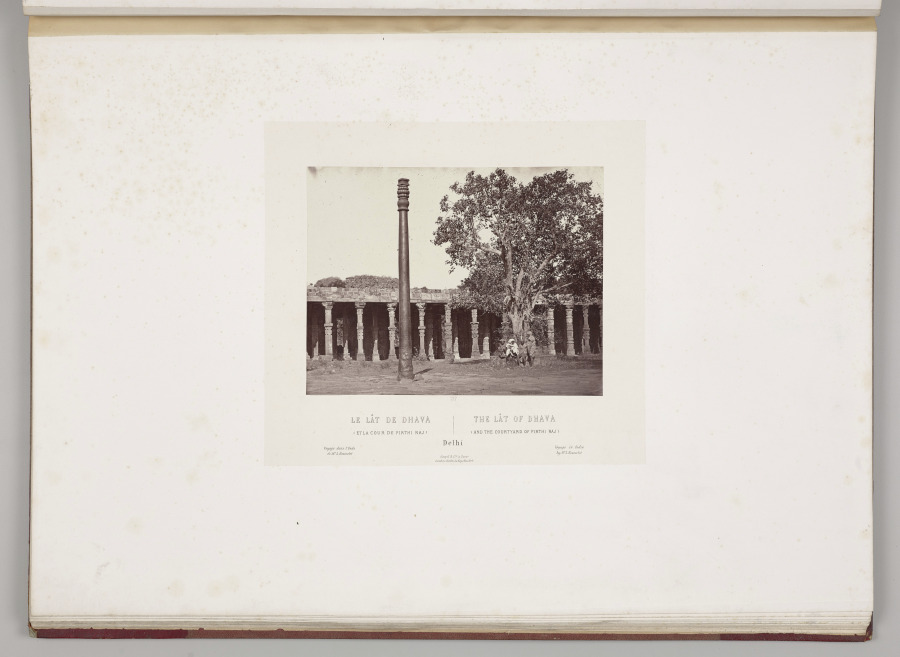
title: The Lât of Dhava and the Courtyard of Pirthi Raj, Delhi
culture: France, 19th century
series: India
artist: Louis-Théophile Marie Rousselet (French, 1845–1929)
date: 1865–68, published 1869–70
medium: Albumen print from glass plate negative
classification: Photograph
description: Concerned that his drawings did not do justice to the splendor of India’s monuments, Rousselet learned photography in India that year, a remarkable accomplishment. He proved to be a talented photographer with a sophisticated sense of composition. The scenes in this volume sweep across sites of Sultanate, Rajput, and Mughal power in northern India, from the sacred Hindu city of Varanasi on the Ganges River to Alwar in Rajasthan. Also included are several scenes of industry and portraits of Indian rulers.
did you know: Louis Rousselet described himself as a “scientific traveler” when he went to India alone at age 18 in 1863 and stayed into 1868.